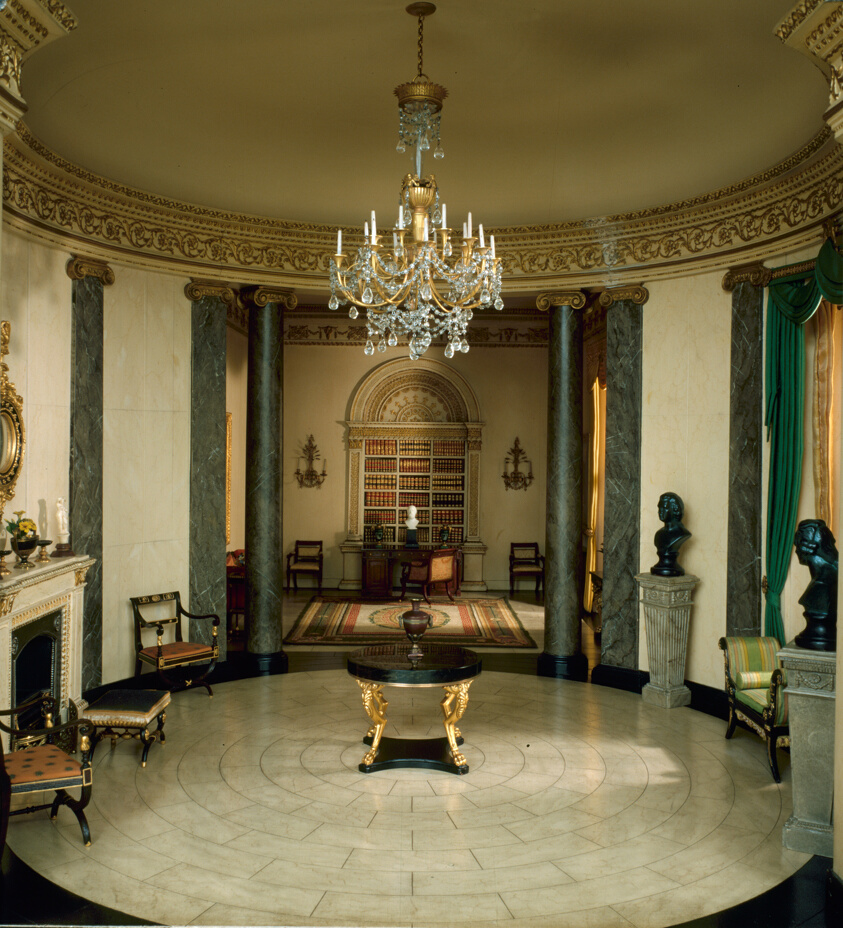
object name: Miniature room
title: E-13: English Rotunda and Library of the Regency Period, 1810-20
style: regency, european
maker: Designed by Narcissa Niblack Thorne; American, 1882-1966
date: c. 1937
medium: Miniature room, mixed media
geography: United States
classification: miniature; thorne rooms